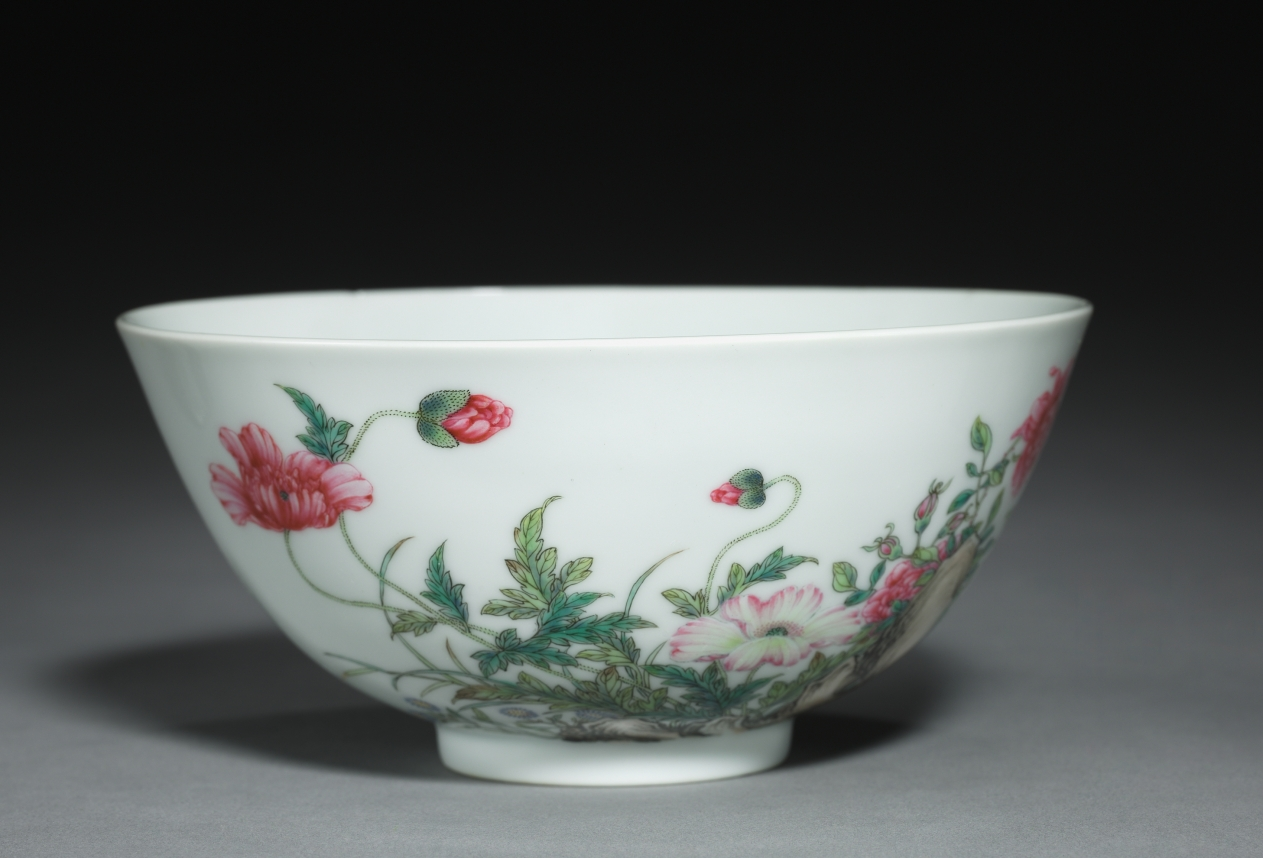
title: Bowl with Poppies, Tree Peony, and Flowering Mimosa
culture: China, Jiangxi province, Jingdezhen, Qing dynasty (1644-1911), Yongzheng mark and reign (1723-1735)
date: 1723–35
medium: porcelain with overglaze enamel decoration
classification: Ceramic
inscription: 大清雍正年制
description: Developments in enamel technology led to new possibilities in polychrome decoration. Pinks appeared, lending their name to the new palette of overglaze colors (famille rose), and the addition of opaque white allowed painters to vary the value of pigments, enhancing the painterly quality of porcelain decoration. As on painted scrolls and album leaves, the image is accompanied with a poem, in this case: "Branches come alive in the moonlight; Blossoms fill the autumn realms."